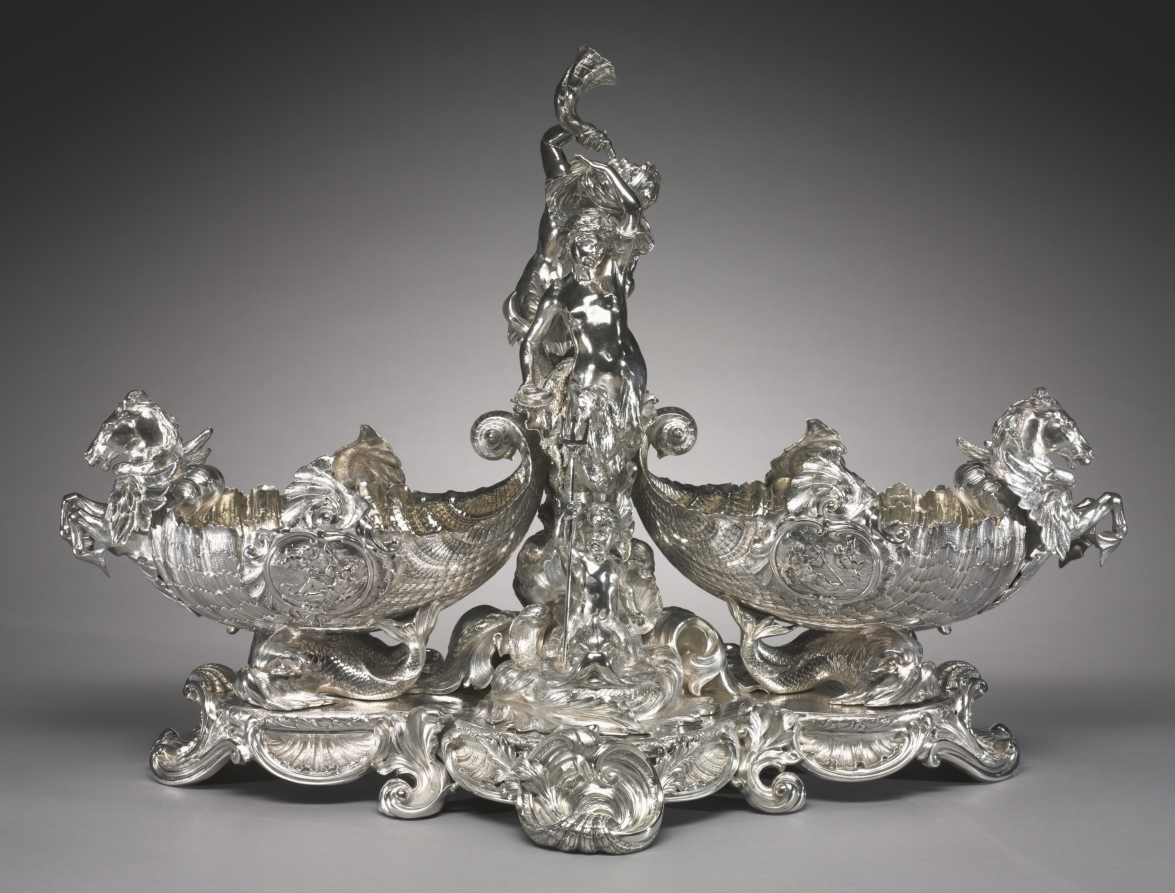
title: Centerpiece from the Nereid Service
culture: England, late 19th-early 20th century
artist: Goldsmith's & Silversmith's Company (British)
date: c. 1900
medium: silver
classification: Silver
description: Originally thought to have been made by the early 19th-century London silversmith Paul Storr because it had been marked with spurious Storr hallmarks, more recent scholarship has revealed that this service, representing the triumph of Great Britain on the high seas through the allegorical images of Grecian nymphs (nereids), was actually made to display at the 1900 world's fair in Paris. Such nationalistic fervor permeated design at the turn of the 20th century, especially in the years leading up to the First World War, when national pride was brought to its heels in Europe through a devastating conflict.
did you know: This centerpiece is actually the product of many hands since the Goldsmiths' and Silversmiths' Company operated as a cooperative of silversmiths who sold their work through the company.